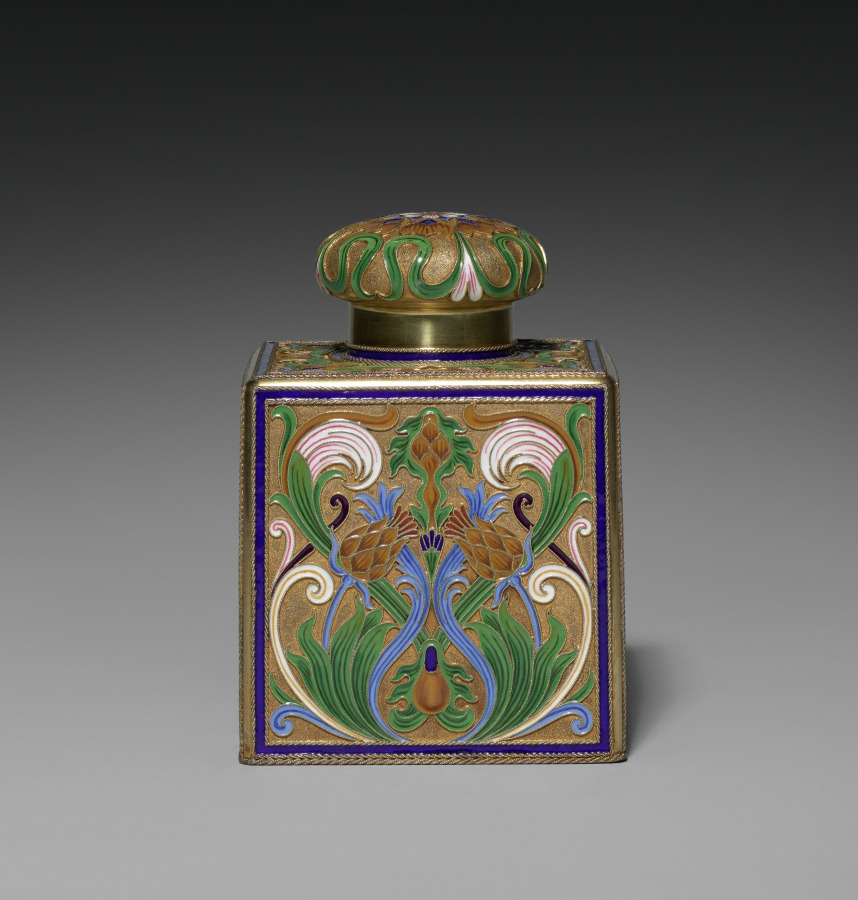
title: Covered Tea Caddy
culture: Russia, St. Petersburg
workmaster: attributed to Feodor Ivanovich Rückert (Russian, 1840–1917)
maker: House of Fabergé (Russian, 1842–1918)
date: 1896–1906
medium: silver gilt, opaque cloisonné enamel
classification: Miscellaneous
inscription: 88, Kokoshnik, tester's initials [assay mark for Moscow, 1899-1908]; C. Fabergé (in Cyrillic); double-headed eagle [imperial warrant]; 88.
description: Fabergé’s craftsmen in Moscow, especially under the watchful eye of workmaster Feodor Rückert, became known for their work in the pan-Slavic or neo-Russian style, hearkening back to 17th-century motifs of Russian folk art. Often on rather conventional shapes, Rückert and his silversmiths created an explosion of color, achieved through the historic technique of cloisonné enamel in which tiny metal lines are soldered to the surface then filled with glass powders in various colors and fired to create a high gloss finish. The result is a spectacular evocation of the 17th-century originals. Far from mere copies, however, Rückert's designs, such as this tea service, employ naturalistic or abstract motifs in a thoroughly modern adaptation of a remarkable earlier period of Russian art and decoration.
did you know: This covered tea caddy is part of a larger tea service.